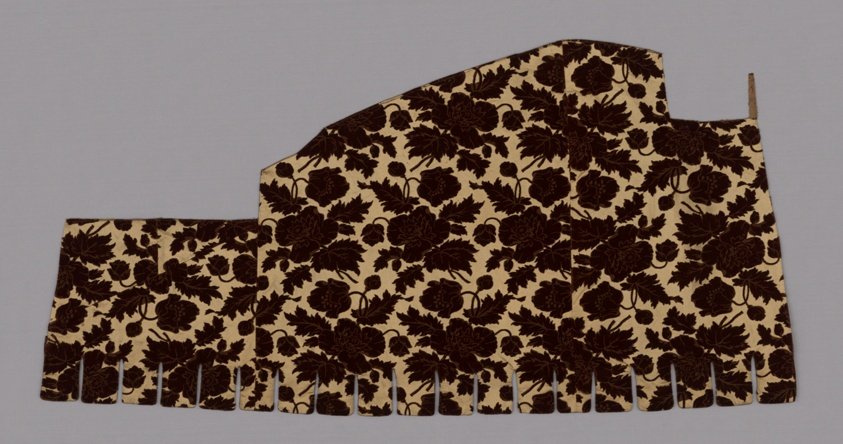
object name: Textile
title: Panel (Possibly Valence)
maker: France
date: c. 1890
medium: Velvet brocaded satin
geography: France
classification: textile; weaving - velvet; weaving